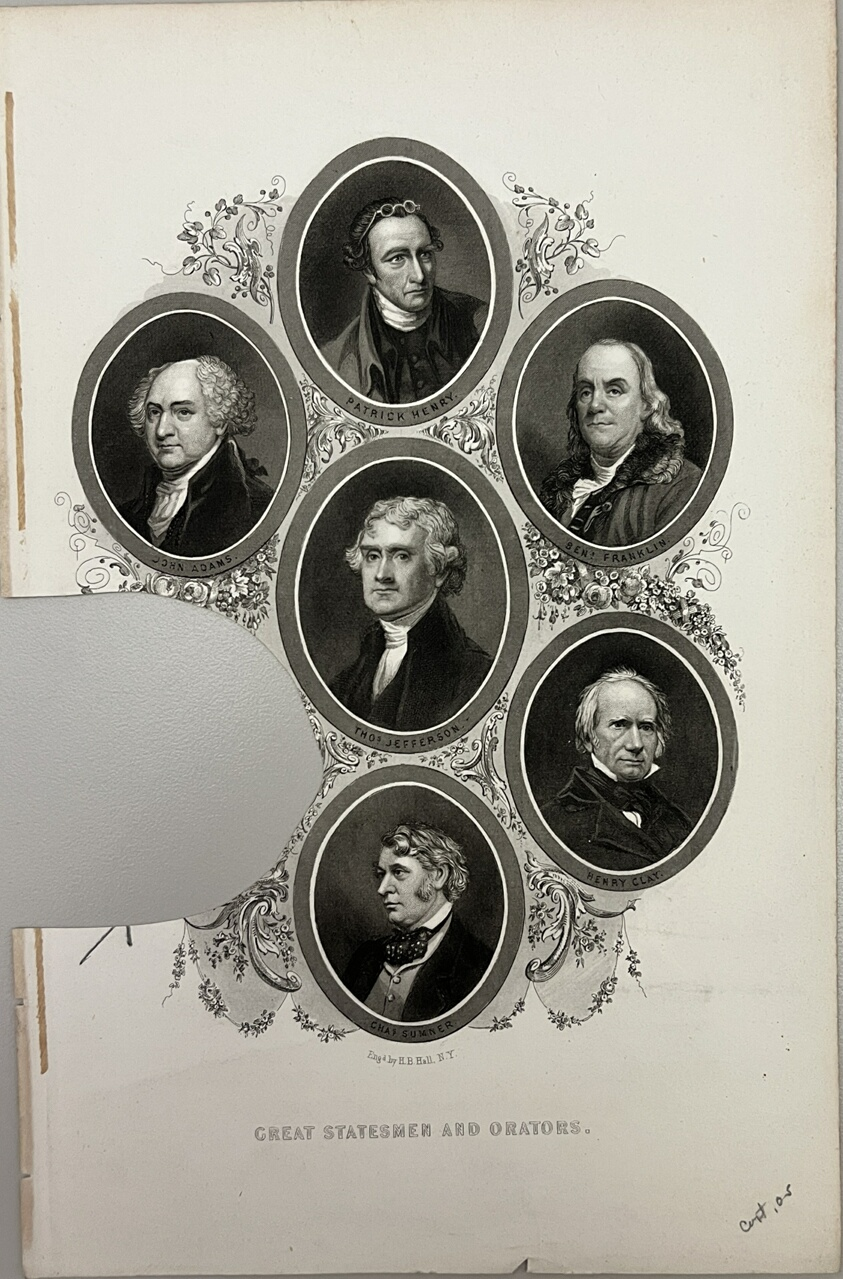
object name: Print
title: Great statesmen and orators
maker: Henry Bryan Hall (American, 1808-1884)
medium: Steel engraving on paper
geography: United States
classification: reproduction; print; prints and drawing